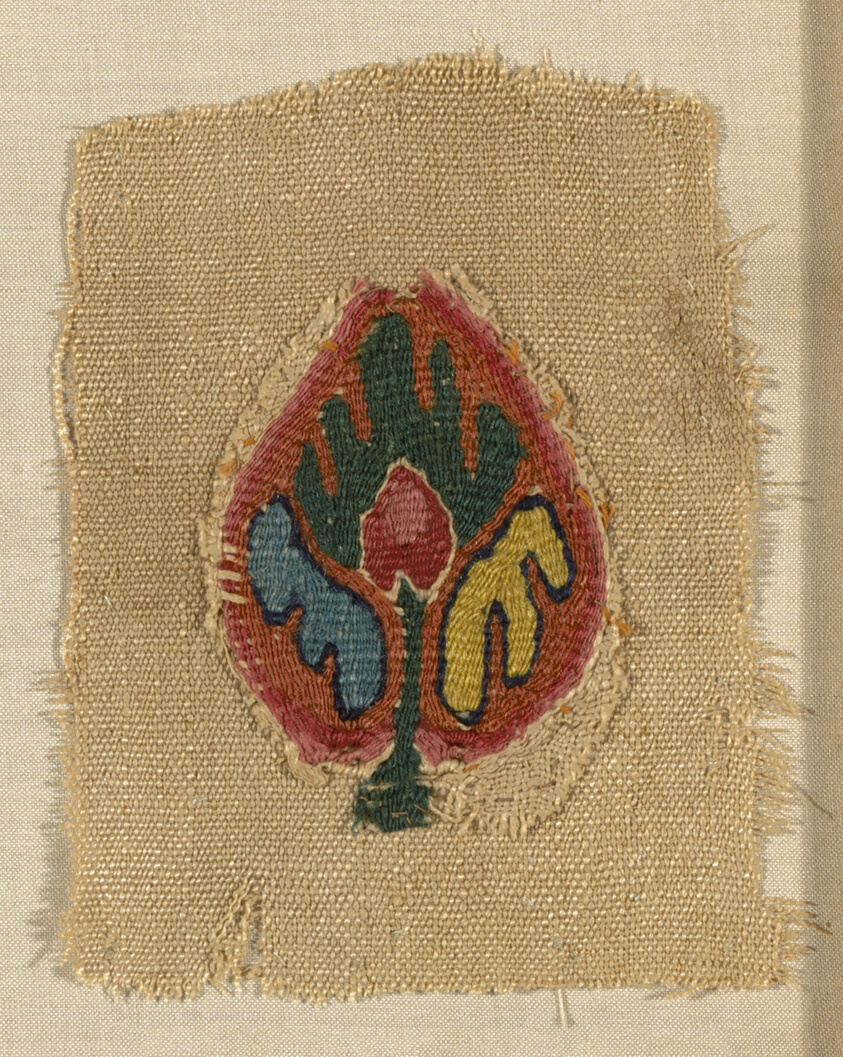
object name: Textile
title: Fragment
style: roman period (egyptian)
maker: Egypt, Akhmin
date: 5th/6th century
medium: Linen and wool, slit tapestry weave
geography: Egypt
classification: textile; weaving